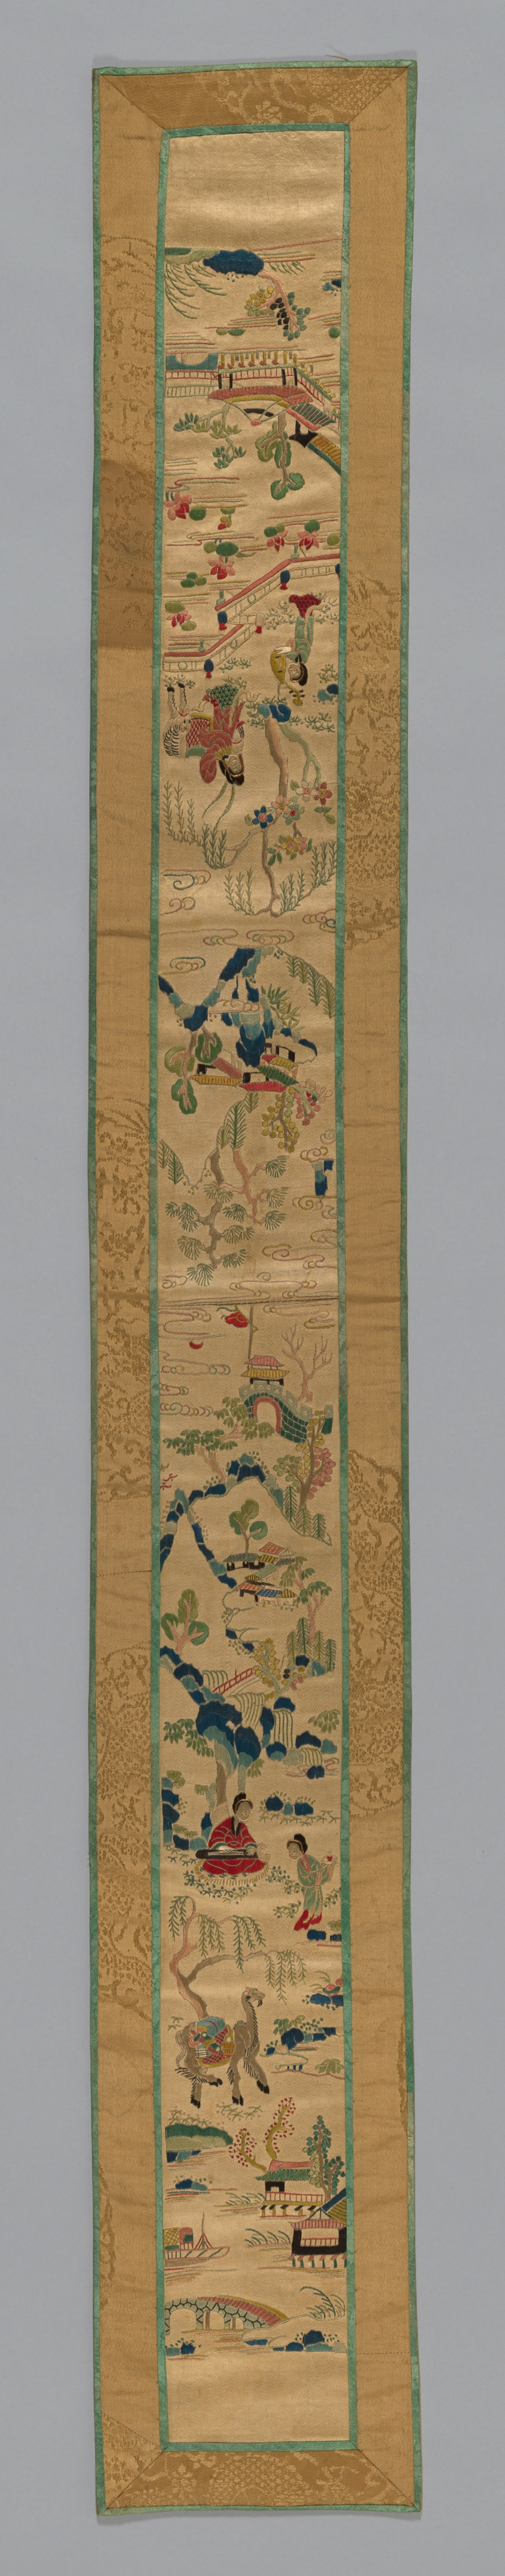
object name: Textile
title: Fragment (Sleeve Band)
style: qing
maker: China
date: Qing dynasty (1644–1911), 1850/75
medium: Figures in landscape embroidered in multi-color silk on tan ground. Bands sewn together, with yellow and green border Sleeve bands; figures in landscape embroidered in multicolor silk on tan ground.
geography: China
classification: textile; needlework (visual works); weaving